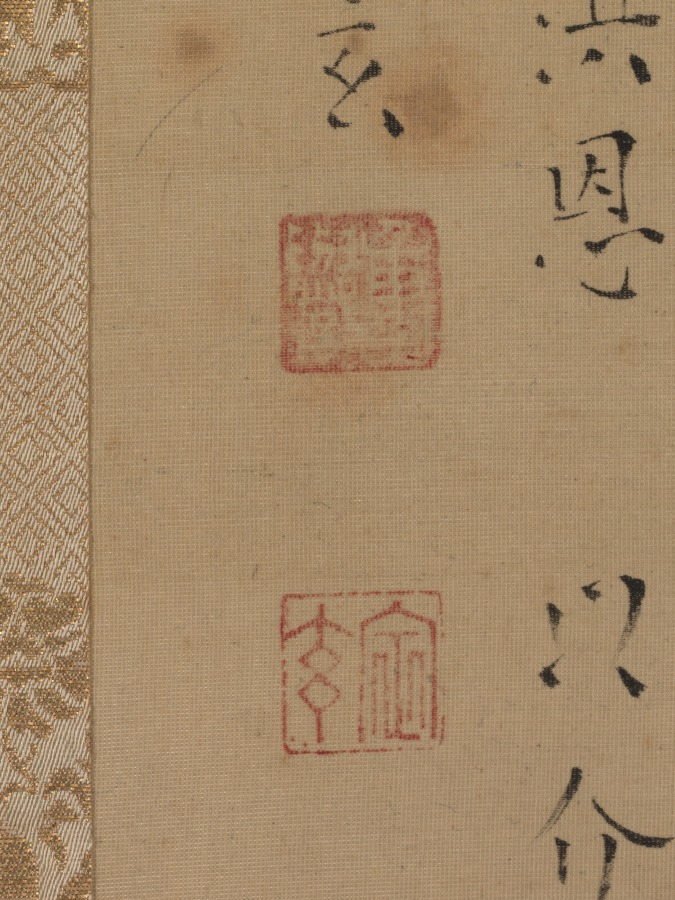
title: Portrait of Samurai-Official: Hirai Rinsei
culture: Japan, Edo period (1615–1868)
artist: attributed to Tsukioka Settei (Japanese, 1710–1786)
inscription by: Jogen (Japanese)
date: 1776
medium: hanging scroll; ink and color on silk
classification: Painting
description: In this pair of figure paintings, the artist provided generational portraits of two clan leaders from the Hirai family, accompanied by lengthy inscriptions in a distinctive calligraphic style from separate scholar-officials.